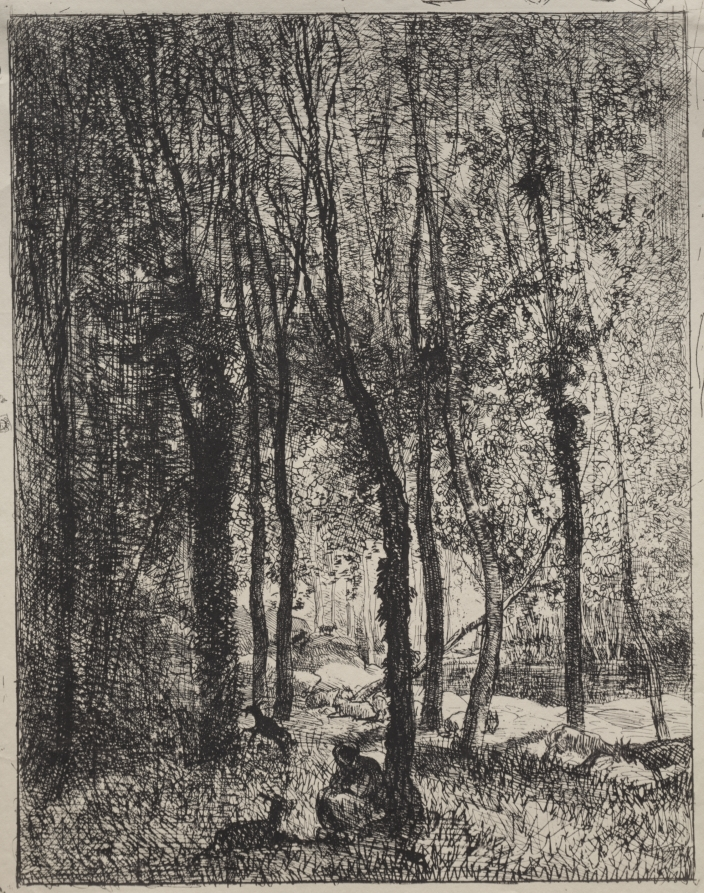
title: The Goatherd Girl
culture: France, 19th century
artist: Charles François Daubigny (French, 1817–1878)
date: original impression 1862, printed in 1921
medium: cliché-verre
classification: Print